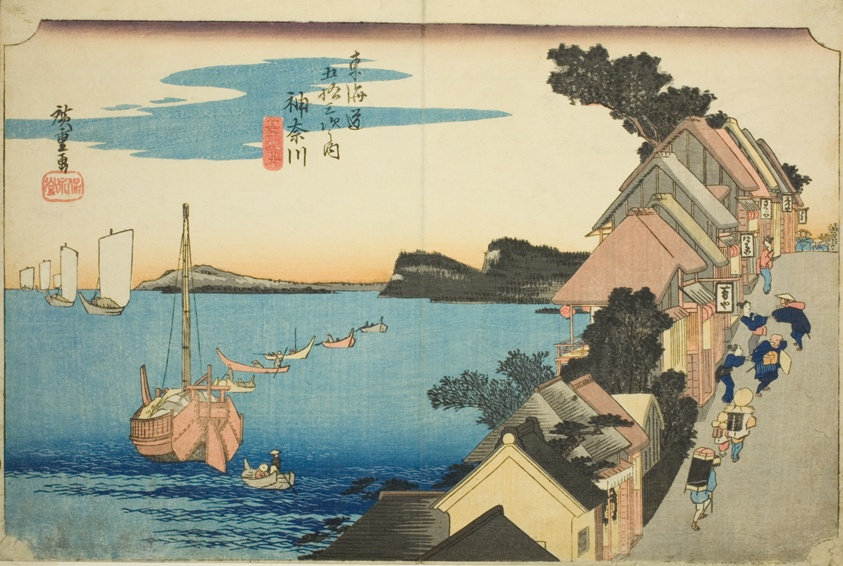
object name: Print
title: Kanagawa: View of the Embankment (Kanagawa, dai no kei), from the series "Fifty-three Stations of the Tokaido Road (Tokaido gojusan tsugi no uchi)," also known as the Hoeido Tokaido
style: Japanese (culture or style)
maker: Utagawa Hiroshige 歌川 広重; Japanese, 1797-1858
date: c. 1833/34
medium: Color woodblock print; oban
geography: Japan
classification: woodblock print; print; asian art